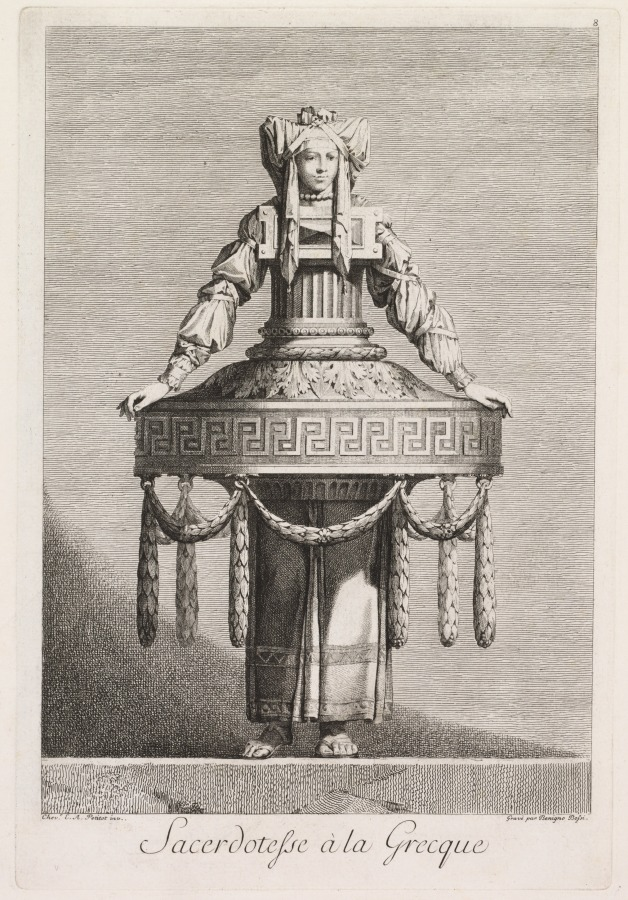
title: Priestess in the Greek Style, Plate 8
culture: Italy, 18th century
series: Mascarade à la Grecque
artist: Benigno Bossi (Italian, 1727–1792)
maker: after Ennemond Alexandre Petitot (French, 1727-1801)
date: 1771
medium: etching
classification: Print